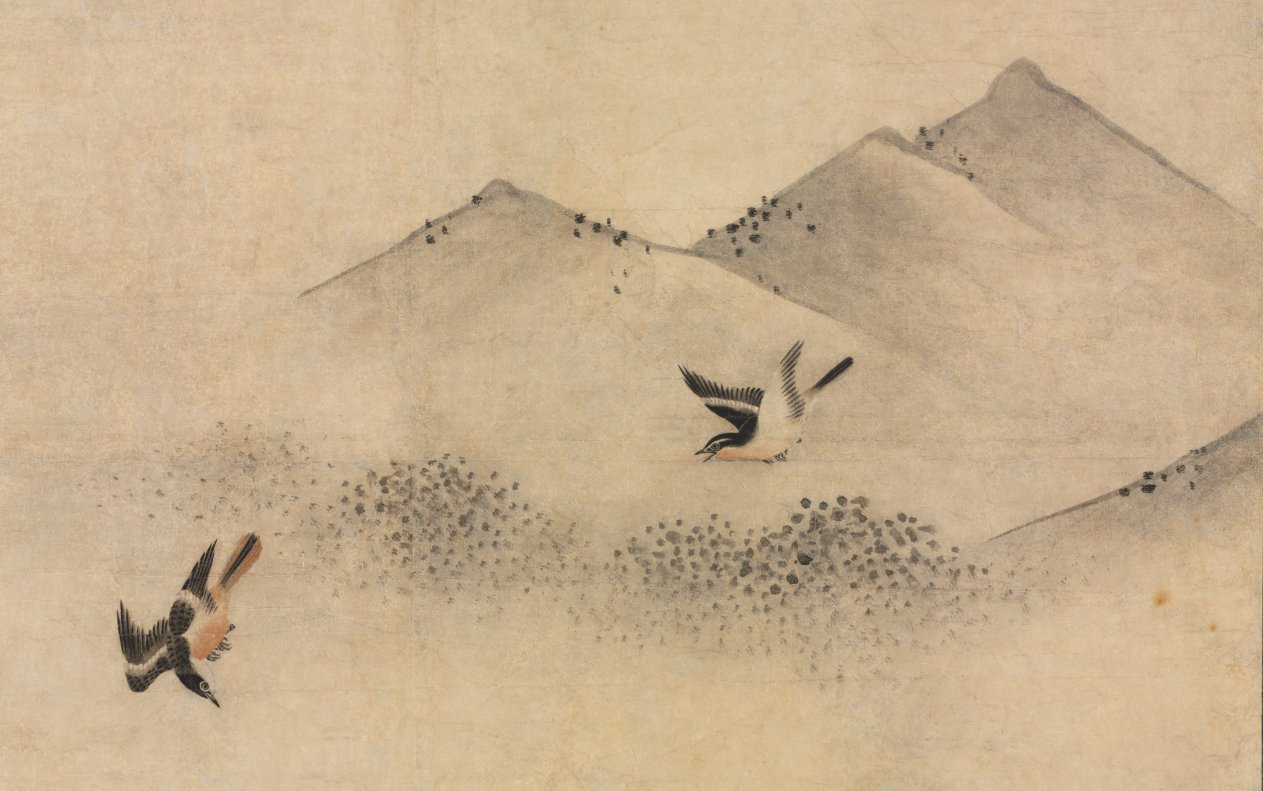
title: Flowers and Birds in a Spring Landscape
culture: Japan, Muromachi period (1392–1573)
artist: attributed to Kano Motonobu (Japanese, c. 1476–1559)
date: 1500s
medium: One of a set of sliding door panels mounted as hanging scrolls; ink and color on paper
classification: Painting